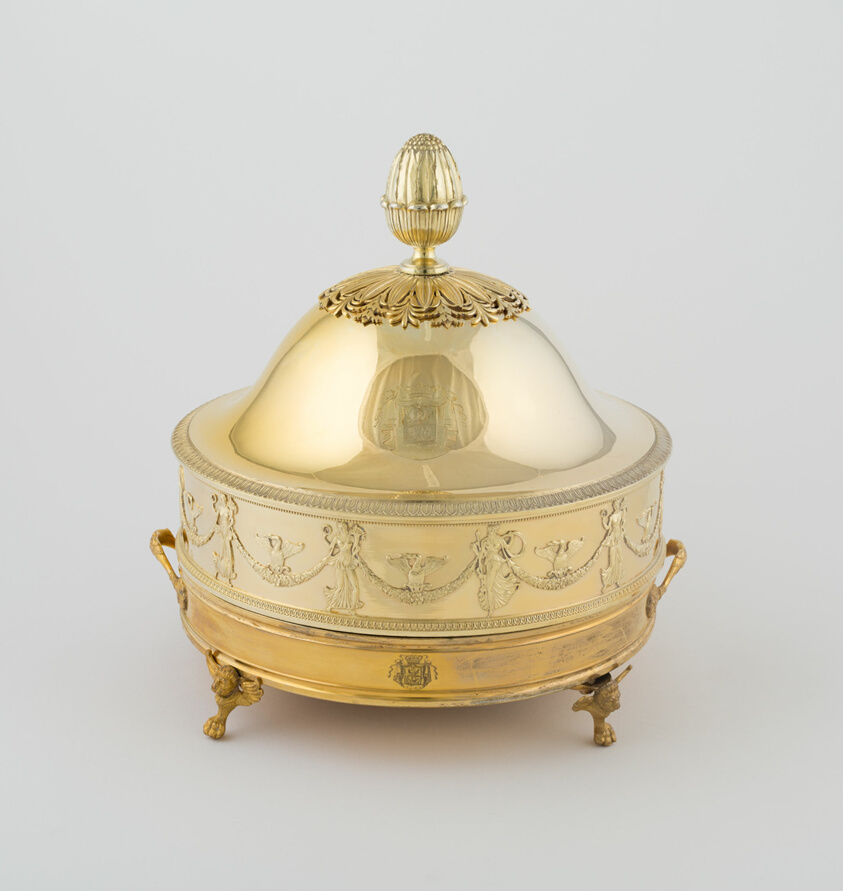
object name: Metalwork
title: Warming Dish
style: napoleonic, empire, Neoclassicism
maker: Martin-Guillaume Biennais (French, 1764–1843); Probably designed after Charles Percier (French, 1764–1838) and; Pierre François Léonard Fontaine (French, 1762–1853); Paris, France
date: c. 1794–1819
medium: Gilt silver and gilt copper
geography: Paris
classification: dish (vessel); silver; metalwork; european decorative arts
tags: Borghese Service, dining, Napoleon